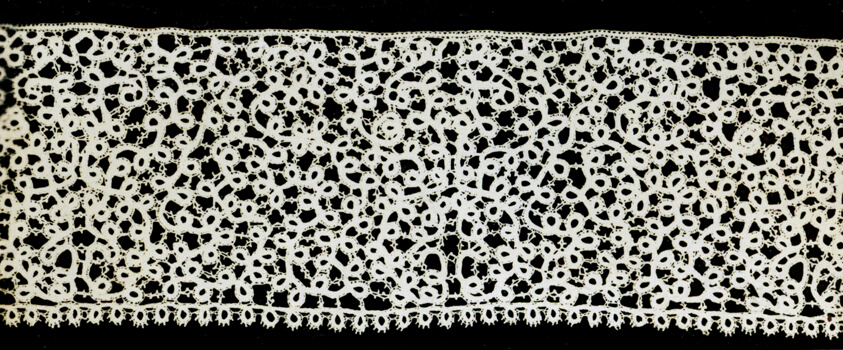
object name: Textile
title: Two Borders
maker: Italy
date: 18th century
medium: Linen, bobbin straight lace (of continuous clothwork tapes; worked in large sections)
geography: Italy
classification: textile; lace - bobbin